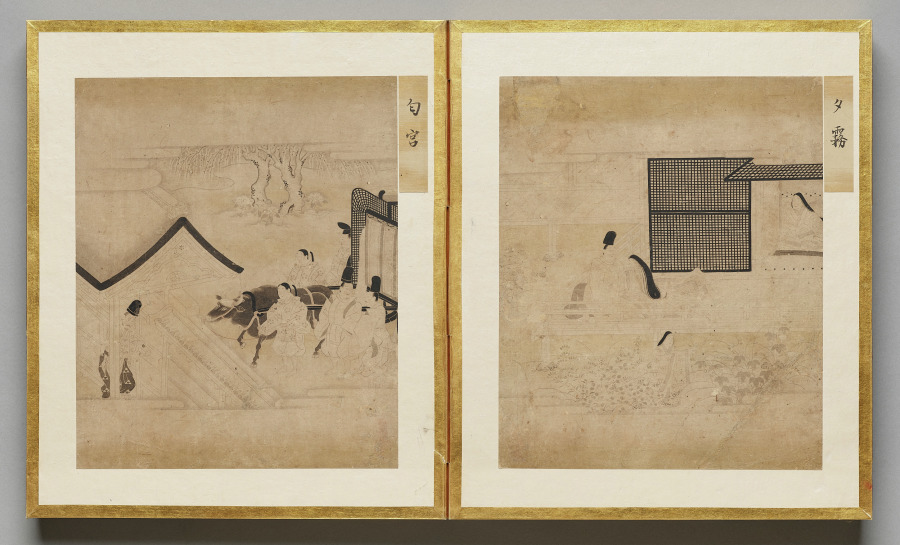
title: Evening Mist from Album of Illustrations for the Tale of Genji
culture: Japan, Edo period (1615–1868)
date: 1600s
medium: painting in an accordion-style album; ink, light color, and gold on paper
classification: Bound Volume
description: This album contains illustrations for the classic literary work the Tale of Genji, authored in the 1000s by Murasaki Shikibu, an aristocrat of the Heian period (794–1185) court. The scenes are painted in the “white drawing” (hakubyō) mode, in which a fine ink line is used to depict figures and spaces with great subtlety, punctuated only occasionally by traces of red pigment for a character’s lips, a detail of a garment, or a decorative element. These two scenes illustrate episodes from the chapters “Thin Veil of Cloud” (Usugumo) and “Barrier Gate” (Sekiya).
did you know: The illustrations are identified by chapter title in cartouches to the upper right of the paintings.